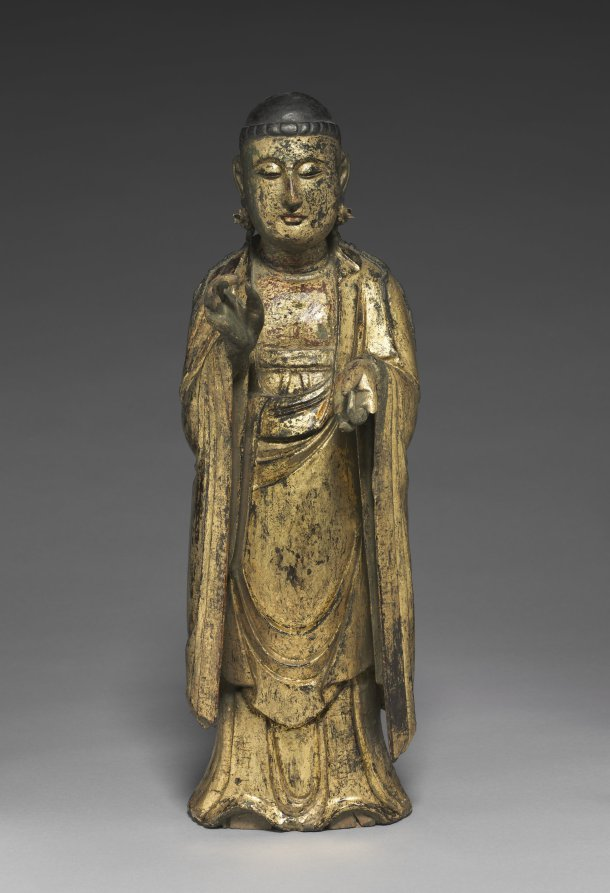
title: Standing Bodhisattva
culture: Korea, Joseon dynasty (1392–1910)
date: 1500s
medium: wood with lacquer and gold, and metal earrings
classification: Sculpture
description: This work demonstrates the enduring presence of Buddhism and its religious practice during the Joseon dynasty (1392–1910) even after Neo-Confucianism, a revised form of Confucianism that emphasized self-cultivation as a path to the formation of a harmonious society and state, became the state religion. Because of its missing crown, it is hard to identify what Buddhist deity this statue represents. But there is no doubt it still can be attributed to a bodhisattva (meaning “enlightened being”) for its iconographic attributes: elaborate jewelry and a lock of long hair.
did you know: This Buddhist statue is missing its crown, which makes it hard to identify what deity it represents.